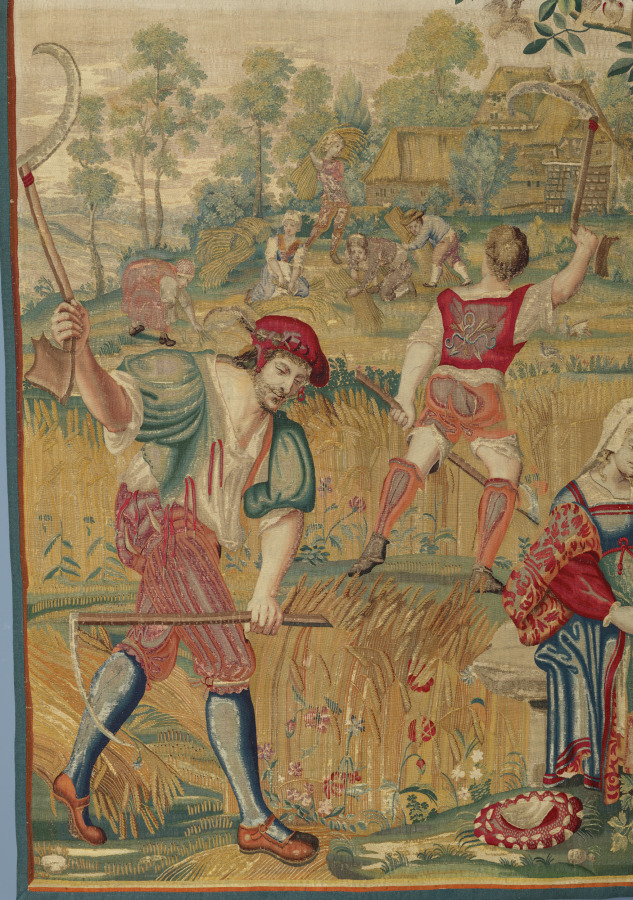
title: Summer: Harvest Scene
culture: France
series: Four Seasons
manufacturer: possibly by Gobelins Manufactory (France, Paris, est. 1662)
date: designed c. 1535, woven mid- to late 1600s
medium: Wool, silk, and gold filé: tapestry weave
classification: Tapestry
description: The wheat harvest took place in July and represented the hard, hot work of summer. The reaper in the foreground and his companion in the middle distance swing their scythes high above their heads as they prepare to cut the wheat stalks. Underneath the shade of an apple tree, three figures in the foreground are determining a price for the wheat. A woman gestures to the coins that the seated man is counting. Behind them another man holds an account book, in which he records their decisions. His pen holder and ink pot hang from his belt. In the distance to the right, two horses draw a cart piled high with wheat toward four farmers who gather bunches of wheat stalks together and tie them into bundles.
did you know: Images of the harvest provided a way to express pride in the fruitfulness and plenty of a particular region and celebrate the diligence of the field laborers.